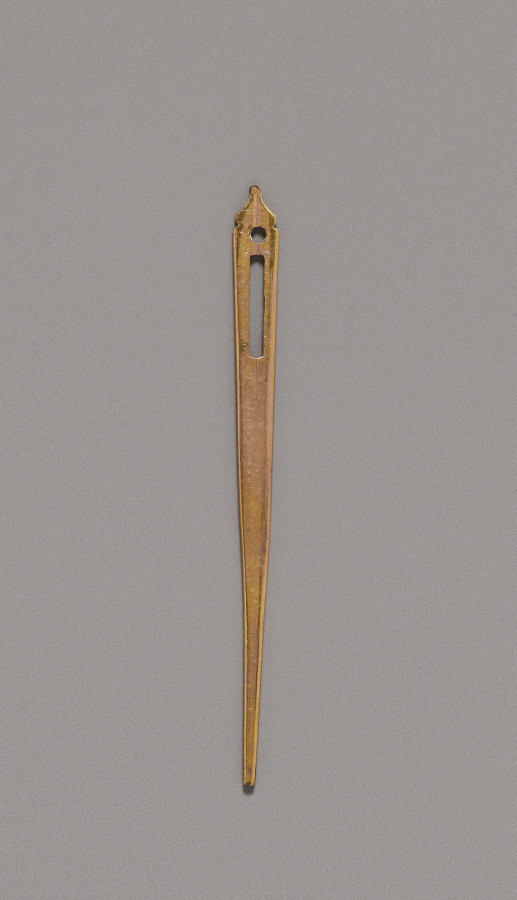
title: Needle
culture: England, 18th century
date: c. 1770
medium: gilt metal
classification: Miscellaneous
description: Luxurious personal objects were an essential part of a privileged wardrobe during the 1700s and early 1800s, emphasizing their owner’s refinement and wealth. Especially popular were étuis, small ornamented cases containing miniature sewing, writing, or grooming implements that hung at a woman’s waist from an ornate clasp, known as a chatelaine. Despite its glittering surface, this small expensive set disguised a system based on the labor and suffering of enslaved or indentured people, whether in gold and stone mines or the shop where it was made.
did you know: Stored inside this case are grooming and writing instruments such as a clasp knife, scissors, an ivory tablet, a pencil, a threading needle used for lacing corsets, and an ear scoop.